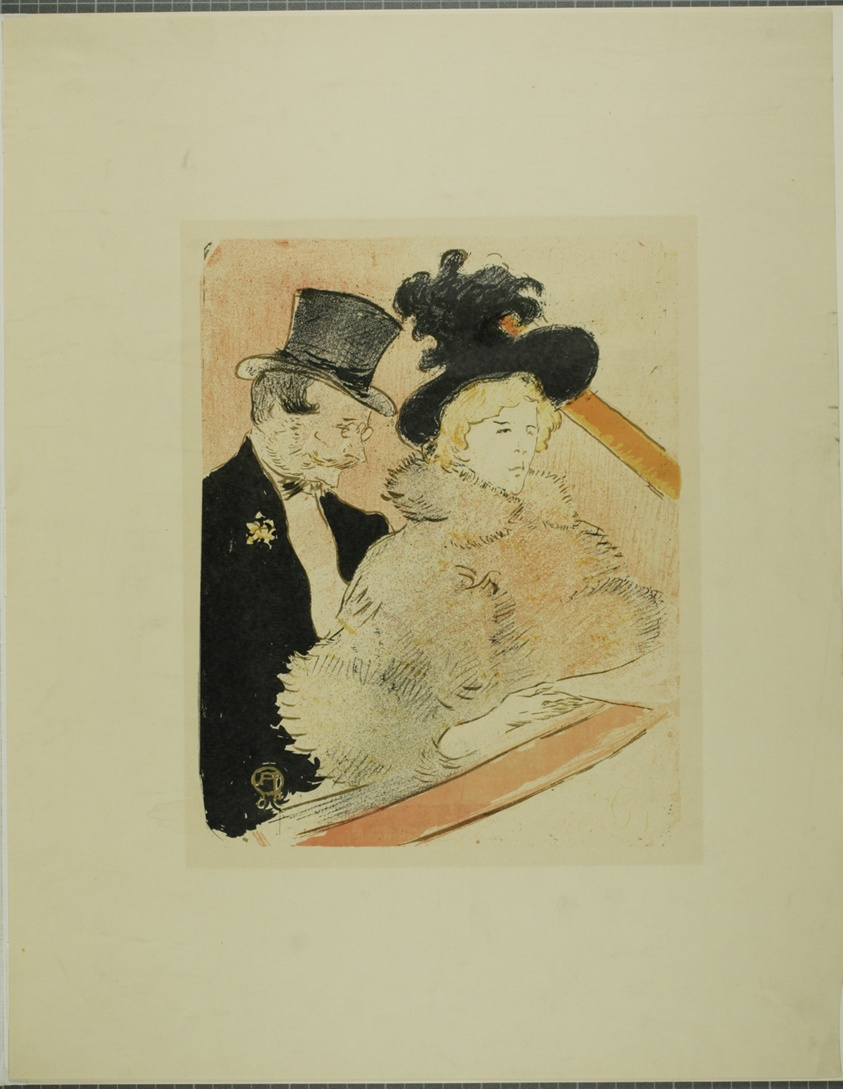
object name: Print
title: At the Concert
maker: Henri de Toulouse-Lautrec (French, 1864-1901)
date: 1896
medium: Color zincograph on cream wove paper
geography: France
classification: zincograph; print; prints and drawing